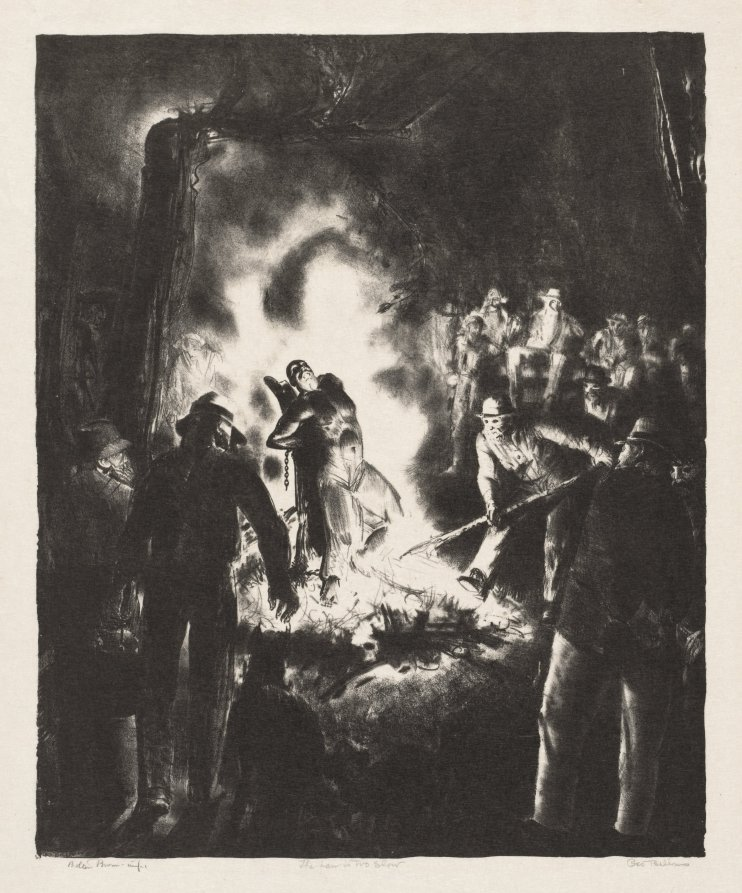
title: The Law is too Slow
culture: America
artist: George Bellows (American, 1882–1925)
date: 1923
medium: lithograph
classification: Print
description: Bellows made this lithograph to illustrate "Nemesis," a fictitious anti-lynching story written by Mary Johnston and published in Century Magazine in May 1923. In the story, a Black man is accused of attacking and killing a white woman; he is then lynched by a mob of white men, all of whom subsequently fall upon misfortune themselves. Bellows portrays the gruesome lynching by highlighting the Black man's strong, illuminated body and surrounding it with an unfeeling mob of white men, some of whom watch as if at a sporting event. The glow of the fire highlights the lynched man's physical as well as internal strength, and visual resonances with Catholic imagery of deaths of saints imply the man's martyrdom. The title of the print may refer both to a twisted justification for lynching cited by racists during the Jim Crow era, as well as to the United States Congress's failure to pass anti-lynching laws.